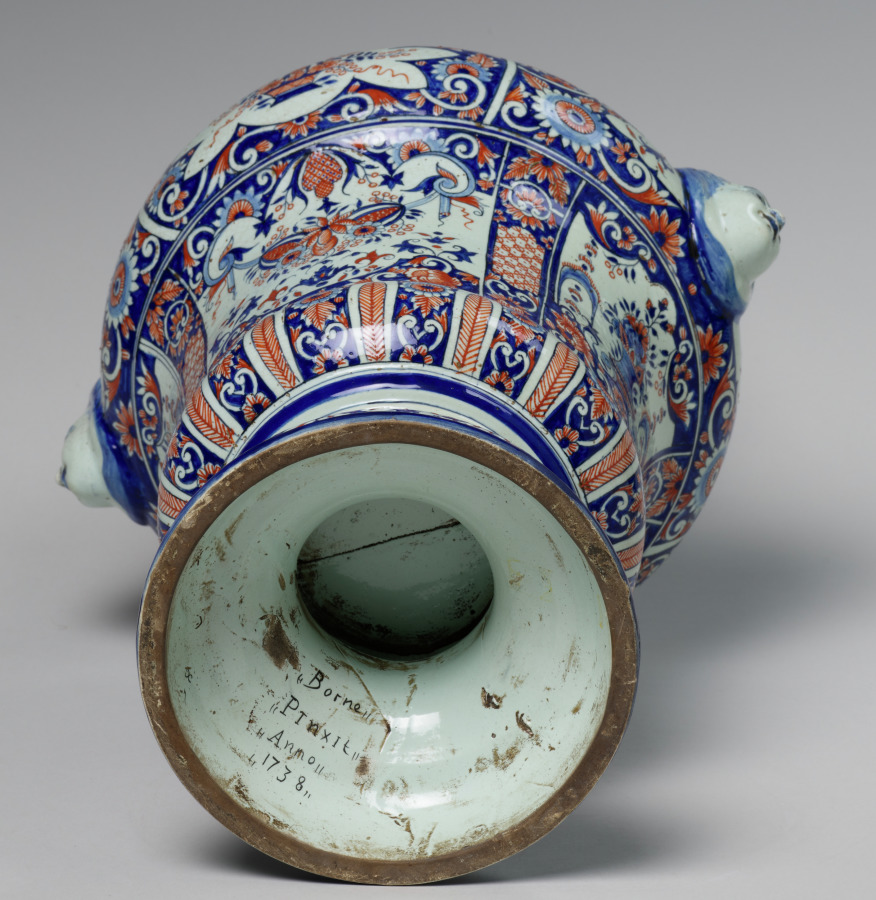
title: Vase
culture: France, Paris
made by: Samson & Co. (French)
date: early 1900s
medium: faience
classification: Ceramic